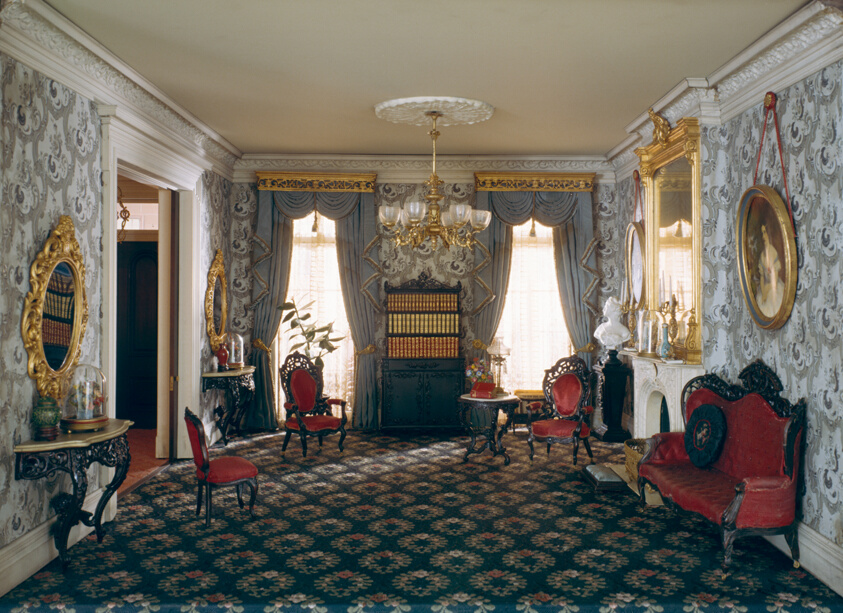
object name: Miniature room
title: A15: New York Parlor, 1850-70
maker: Designed by Narcissa Niblack Thorne; American, 1882-1966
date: c. 1940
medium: Miniature room, mixed media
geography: United States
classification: miniature; thorne rooms